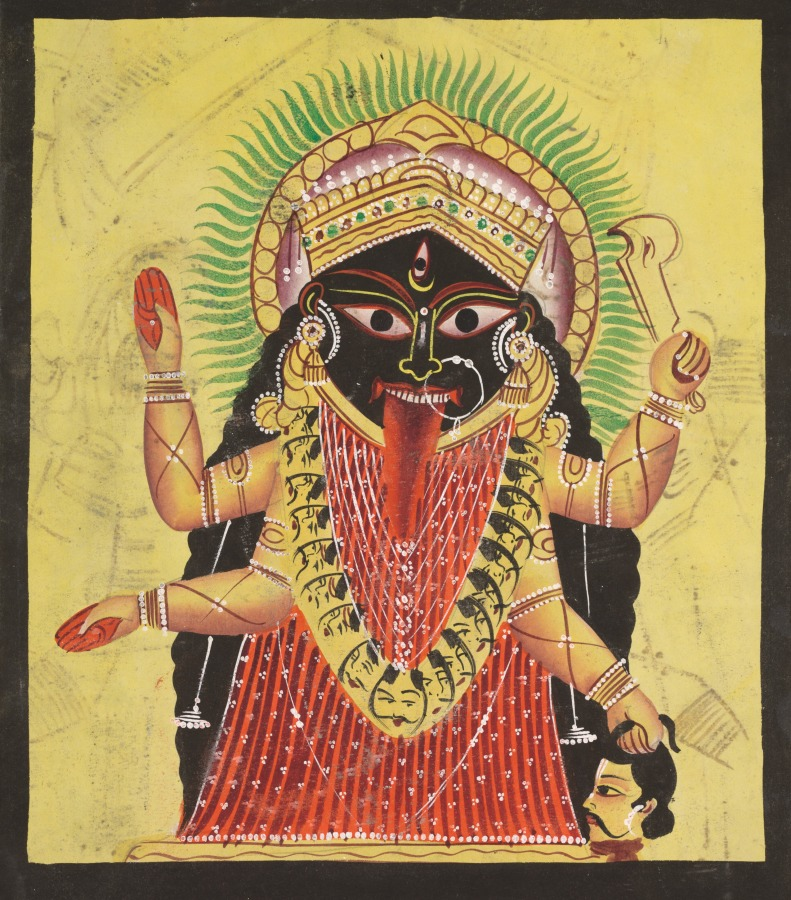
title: Kali Enshrined (verso), from a Kalighat album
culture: Eastern India, Bengal, Kolkata, Kalighat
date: c. 1890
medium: Gum tempera, graphite, and ink on paper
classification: Painting